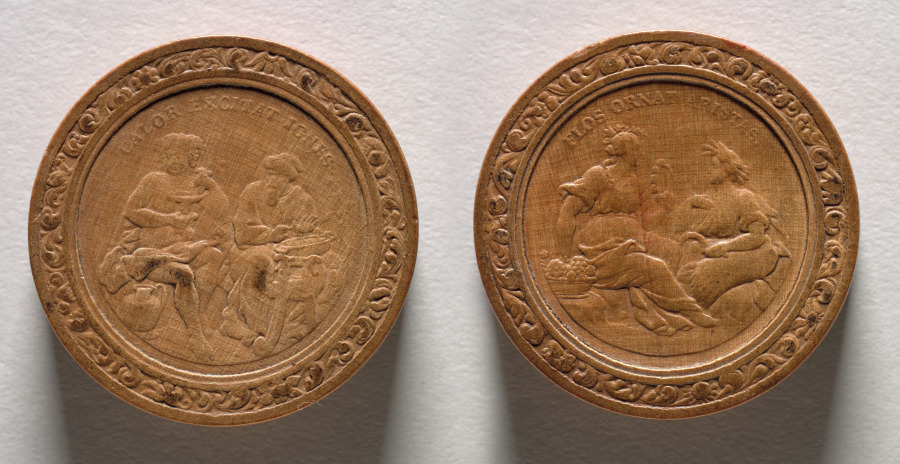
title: Gaming Piece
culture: Germany, late 17th-early 18th Century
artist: Martin Brunner (German, 1659–1725)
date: c.1700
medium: wood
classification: Furniture and woodwork